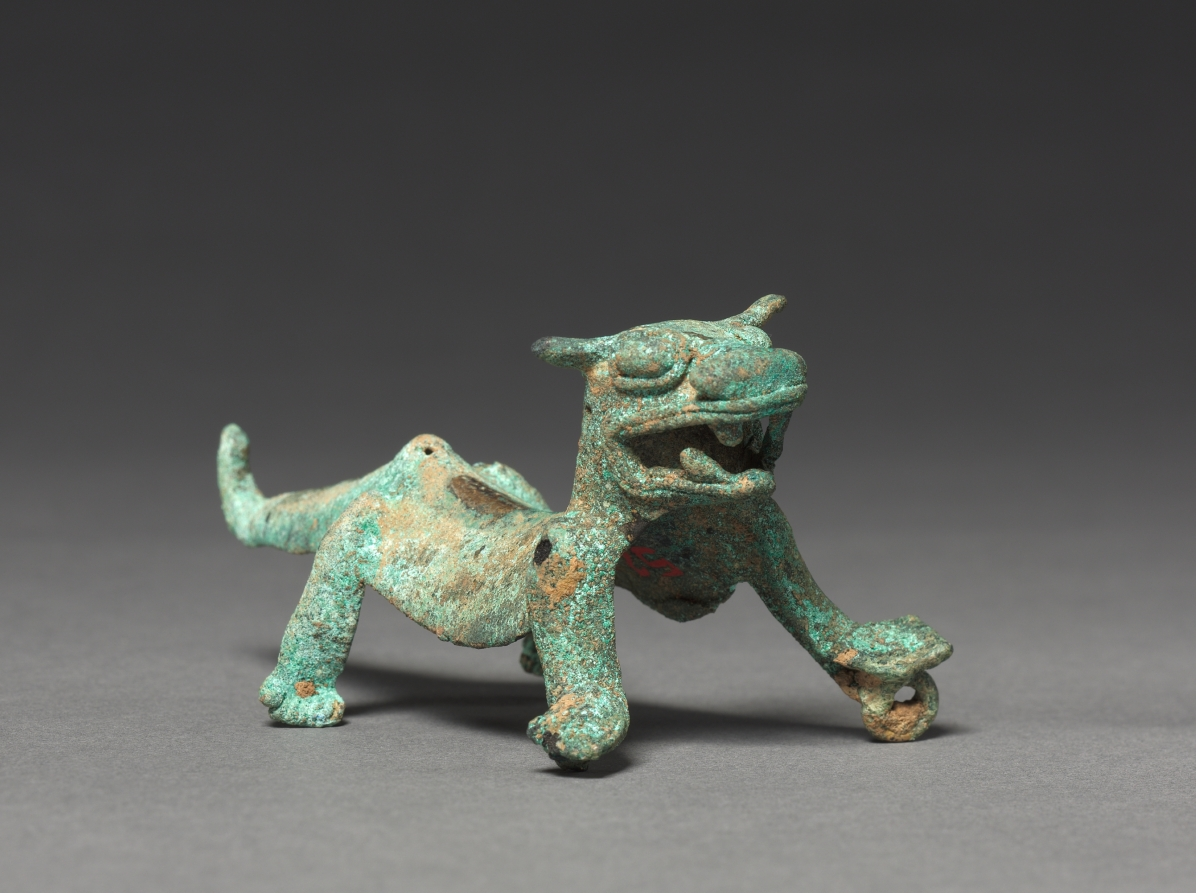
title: Jaguar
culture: Costa Rica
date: c. 1000–1500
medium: gold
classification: Metalwork